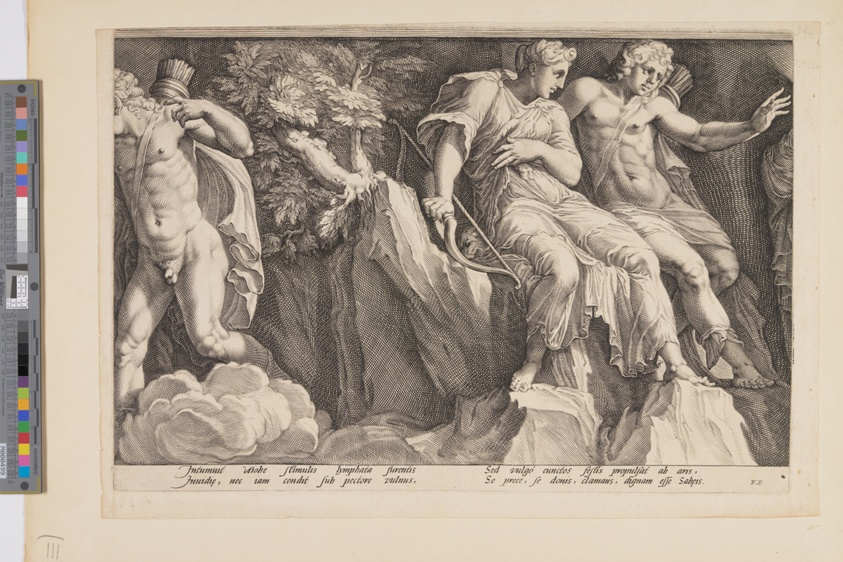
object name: Print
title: The Punishment of Niobe (Plate 3)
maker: Jan Saenredam (Dutch, 1565–1607); after Polidoro da Caravaggio (Italian, c. 1499–c. 1543)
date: 1594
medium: Engraving on ivory laid paper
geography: Netherlands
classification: print; paper; prints and drawing; engraving